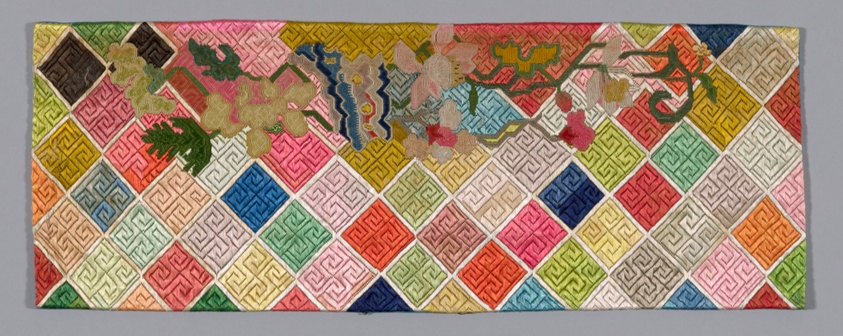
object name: Textile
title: Panel (Furnishing Fabric)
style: qing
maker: Han-Chinese (China)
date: Qing dynasty (1644–1911), 1875/1900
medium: Geometric and floral pattern embroidered on gauze.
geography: China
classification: textile; weaving; needlework (visual works); furnishing textile